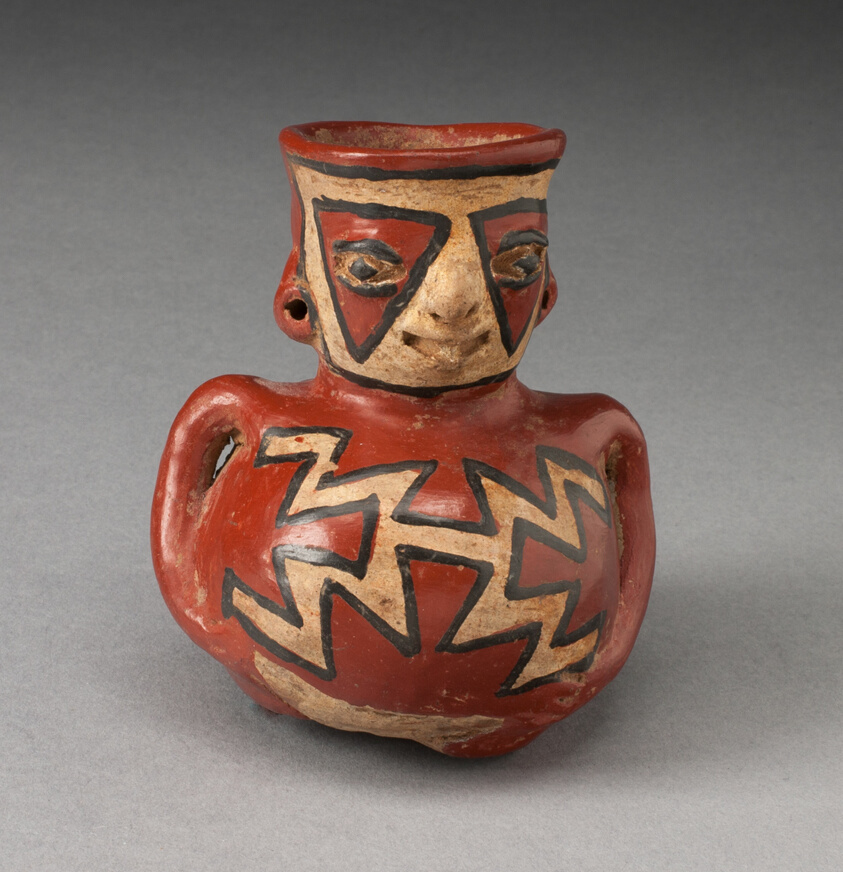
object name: Vessel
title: Vessel in the Form of a Figure with Geometric Face and Body Paint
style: chupicuaro, Arts of the Americas, mesoamerican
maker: Chupícuaro (Guanajuato or Michoacán, Mexico)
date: 500 BCE–200 CE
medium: Ceramic and pigment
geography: Mexico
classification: earthenware; art of the americas; ceramics; vessel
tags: people